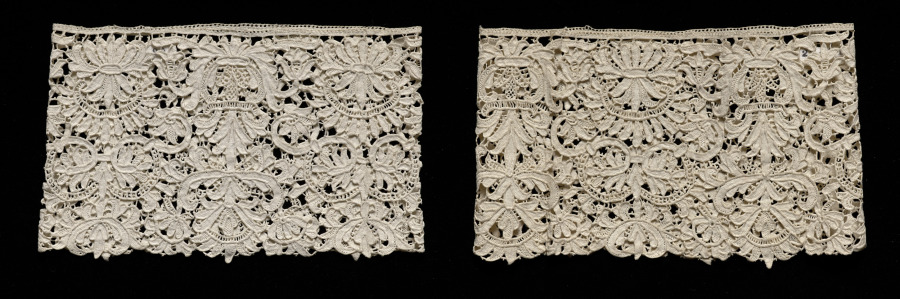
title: Pair of Lace Cuffs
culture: Italy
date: 1600–1640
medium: Needle lace (punto in aria)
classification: Lace